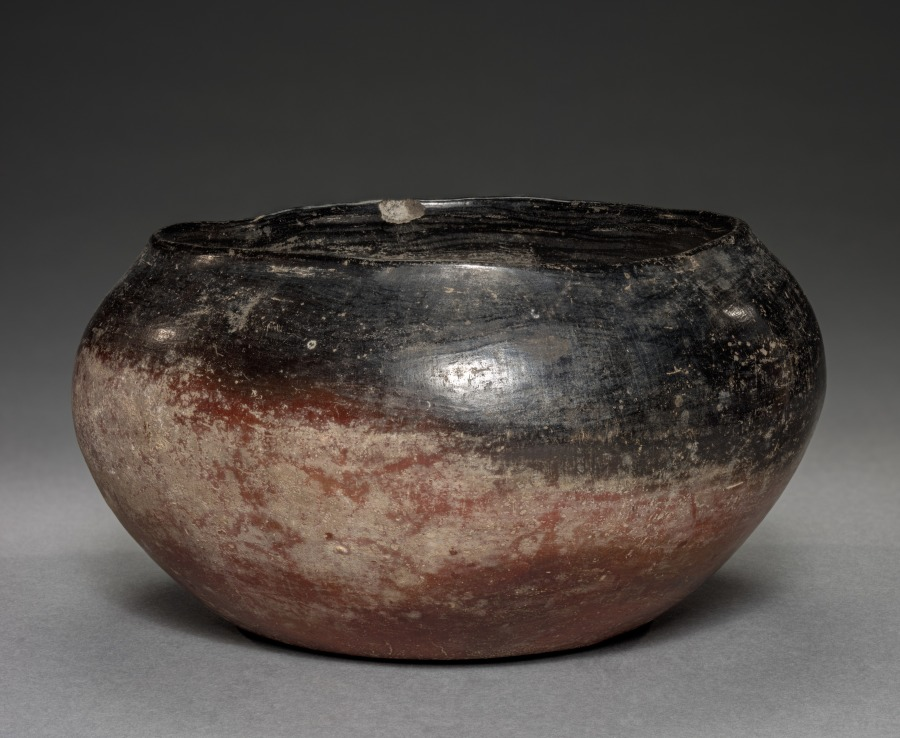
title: Black-Topped Bowl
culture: Egypt, Predynastic (5000–2950 BCE), Naqada II (3650–3300 BCE)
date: 4000–3000 BCE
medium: Nile silt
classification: Vessels